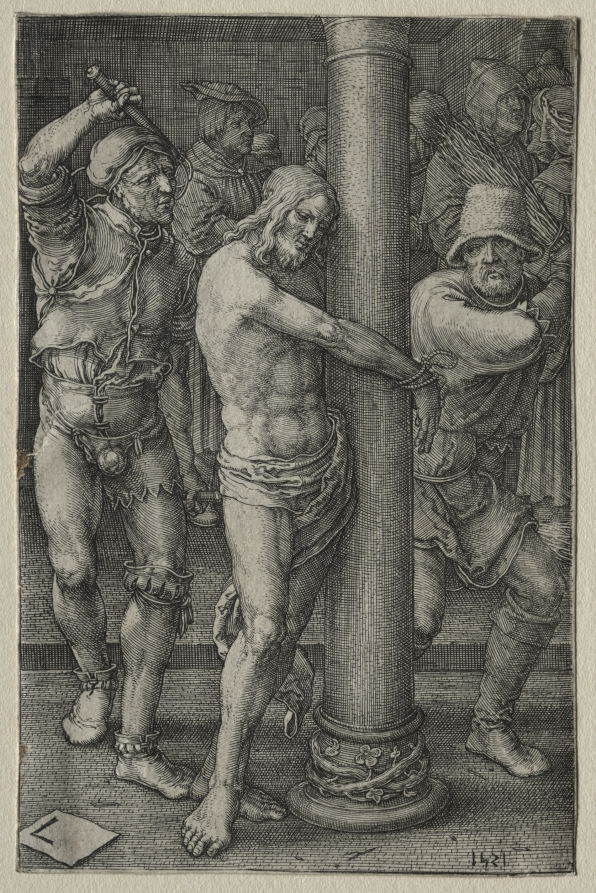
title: The Passion: The Flagellation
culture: Netherlands, 16th century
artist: Lucas van Leyden (Netherlandish, 1494–about 1533)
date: 1521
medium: engraving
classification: Print